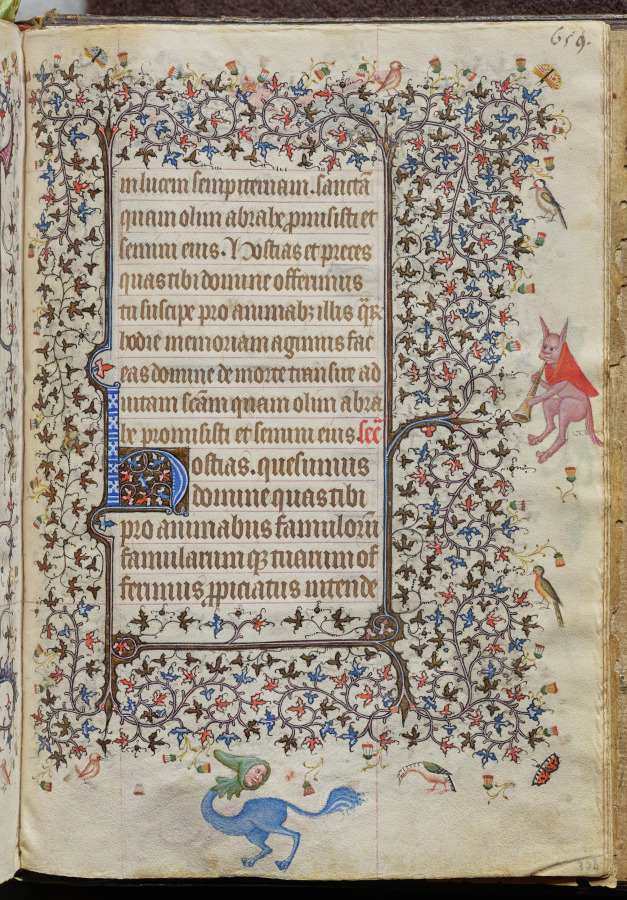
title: Hours of Charles the Noble, King of Navarre (1361-1425), fol. 324r, Text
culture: France, Paris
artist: Master of the Brussels Initials and Associates (French)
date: c. 1405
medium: ink, tempera, and gold on vellum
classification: Bound Volume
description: This precious volume was obviously highly prized by its owner, the French-born King of Navarre, who had his coat of arms painted on no less than twenty folios. Rather than directly commissioning this manuscript from a specific workshop, it seems that Charles the Noble acquired his book of hours -- perhaps ready-made for the luxury market -- while on a trip to Paris in 1404-05. A collaborative effort, six painting styles are evidenced within the pages of this codex, those of two Italians, two Frenchmen, and two Netherlanders. The painter who was responsible for the planning and decoration of the book, and who produced seventeen of the large miniatures, was a Bolognese artist known as the Master of the Brussels Initials. His principal assistant, responsible for most of the borders, was a Florentine who signed his name "Zecho" da Firenze on folio 208 verso.